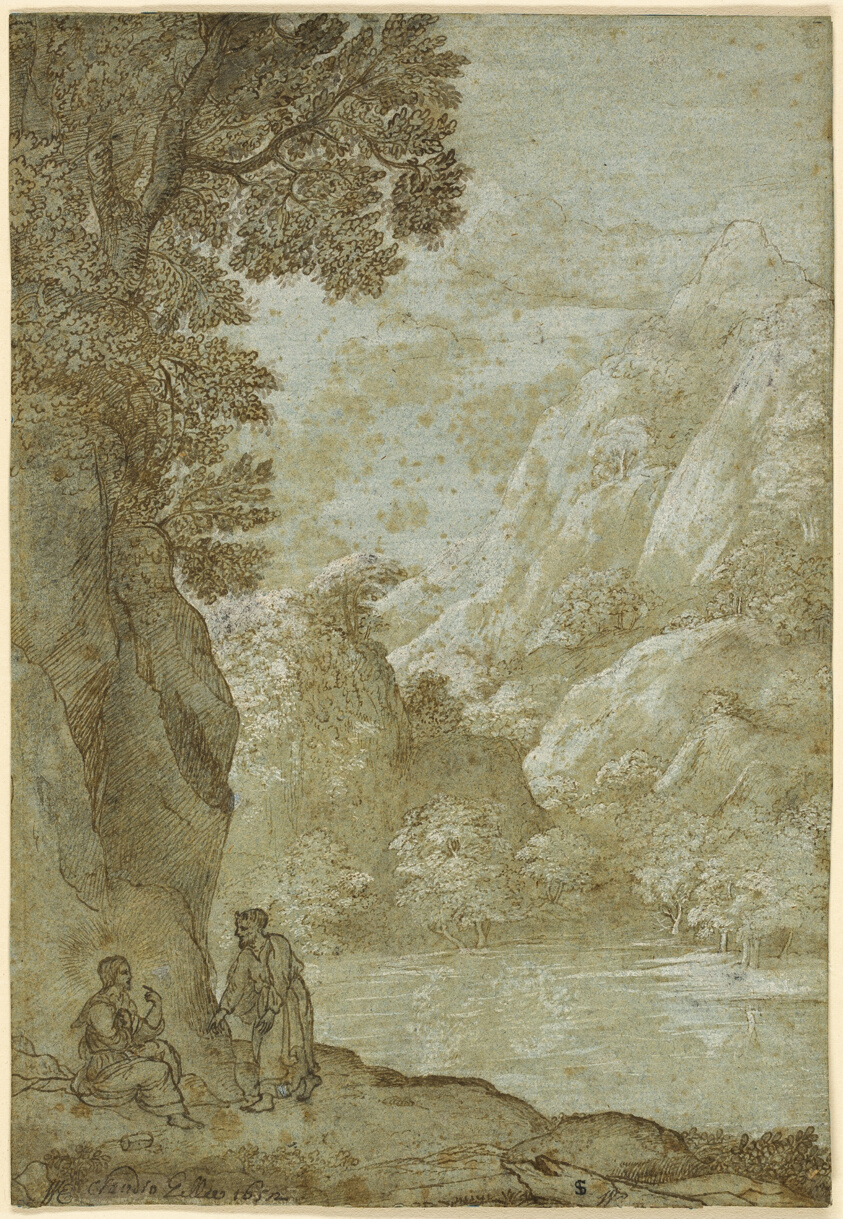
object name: Drawing and Watercolor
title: Landscape with the Temptation of Christ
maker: Possibly Angeluccio (Italian, active 1645-1650); or possibly after Claude Lorrain (French, 1600-1682)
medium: Pen and brown ink, with brush and brown wash, and black chalk, heightened with lead white (discolored), on blue laid paper, laid down on blue wove paper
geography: France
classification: pen and ink drawings; drawings (visual works); prints and drawing